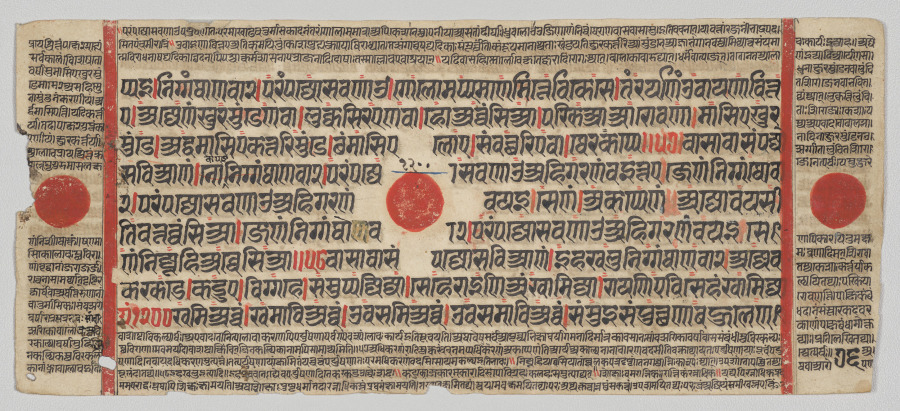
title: Text, Folio 76 (verso), from a Kalpa-sutra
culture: Western India, Gujarat, last quarter of the 15th century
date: c. 1475–1500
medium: Gum tempera, ink, and gold on paper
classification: Painting